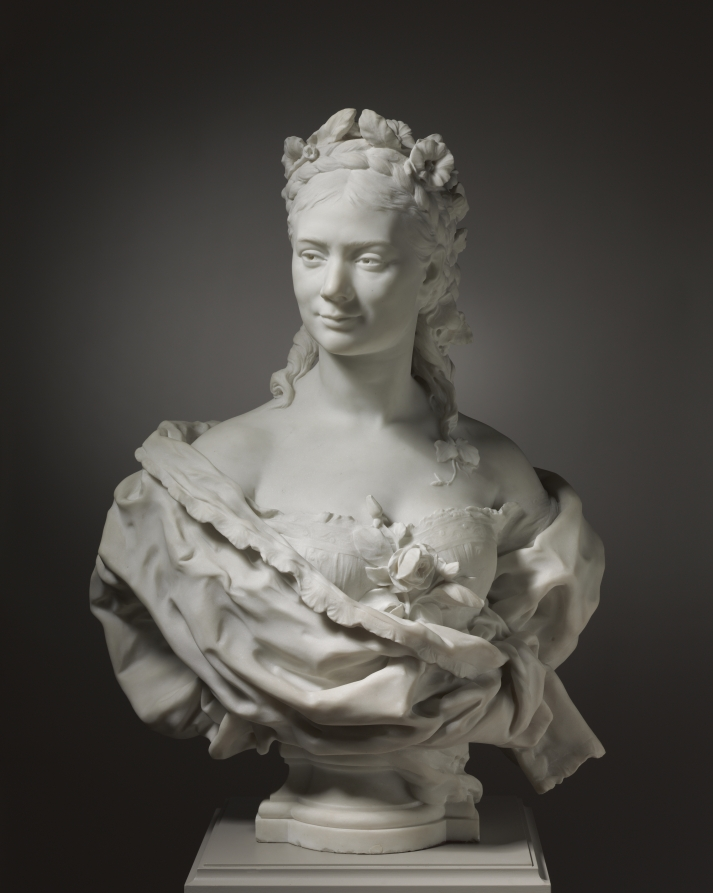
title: Bust of a Lady (possibly Fanny Coleman)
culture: France, 19th century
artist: Jean-Baptiste Carpeaux (French, 1827–1875)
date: 1872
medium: marble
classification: Sculpture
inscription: inscribed on base: J. Bte CARPEAUX 1872.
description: Abandoning the strict frontality and symmetry of the neoclassical style, Carpeaux was instead inspired by French portrait busts of the 1600s and 1700s. This bust probably depicts Fanny Coleman, an English actress with whom Carpeaux may have had a romantic relationship. The turn of the head and the undulating drapery infuse the figure with a sense of drama. Patronized by Napoleon III, Carpeaux created the celebrated figural group La Danse for the facade of the Opera Garnier in Paris, a work renowned for its sensual nudes, but denounced by contemporaries as an affront to public decency.